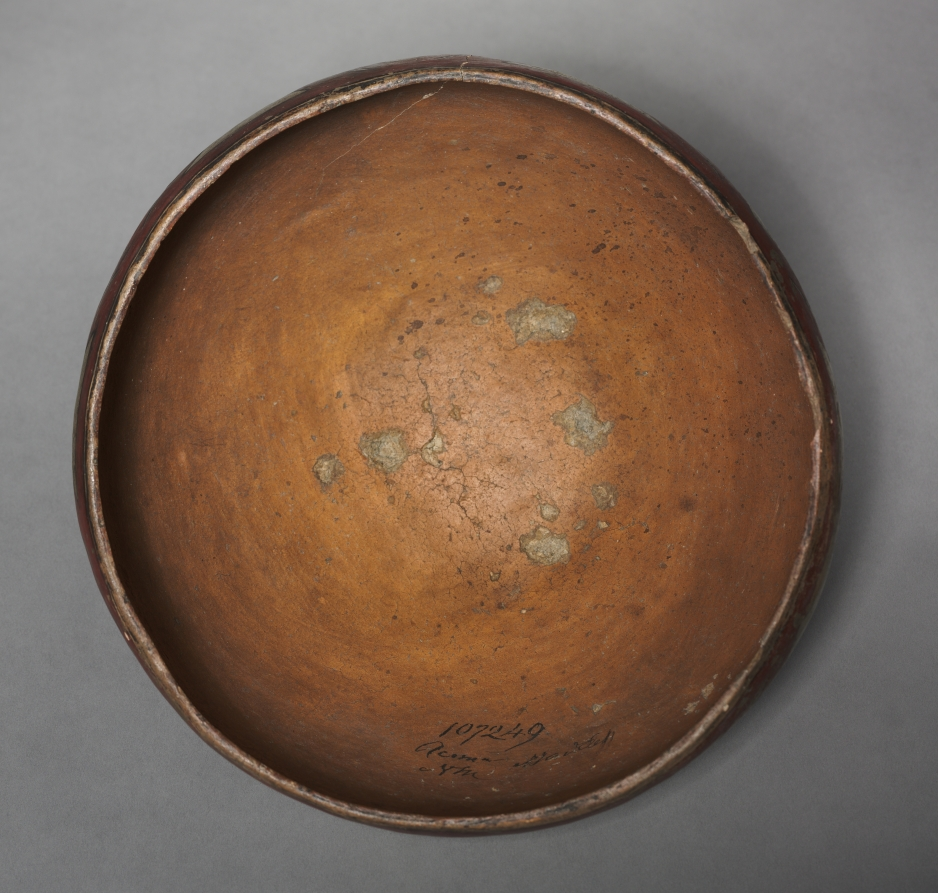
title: Stew Bowl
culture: Southwest,Pueblo, Acoma, Post-Contact Period, 20th century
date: 1860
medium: ceramic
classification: Ceramic